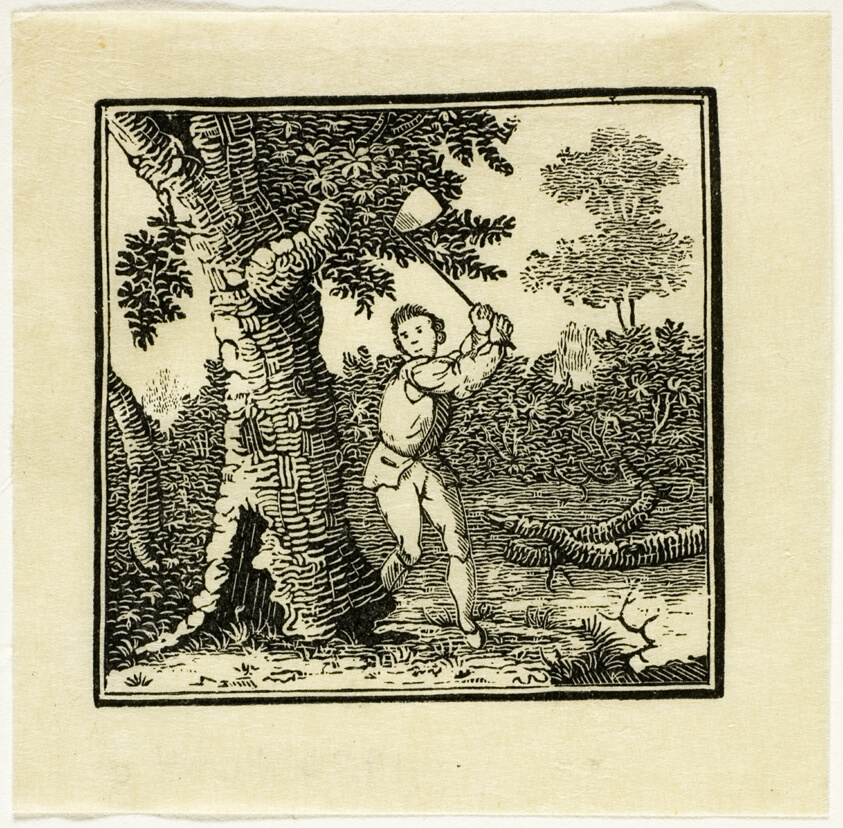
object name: Print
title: Book Illustration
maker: Thomas Bewick (English, 1753-1828)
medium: Wood engraving on paper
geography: England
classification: wood engraving; print; prints and drawing